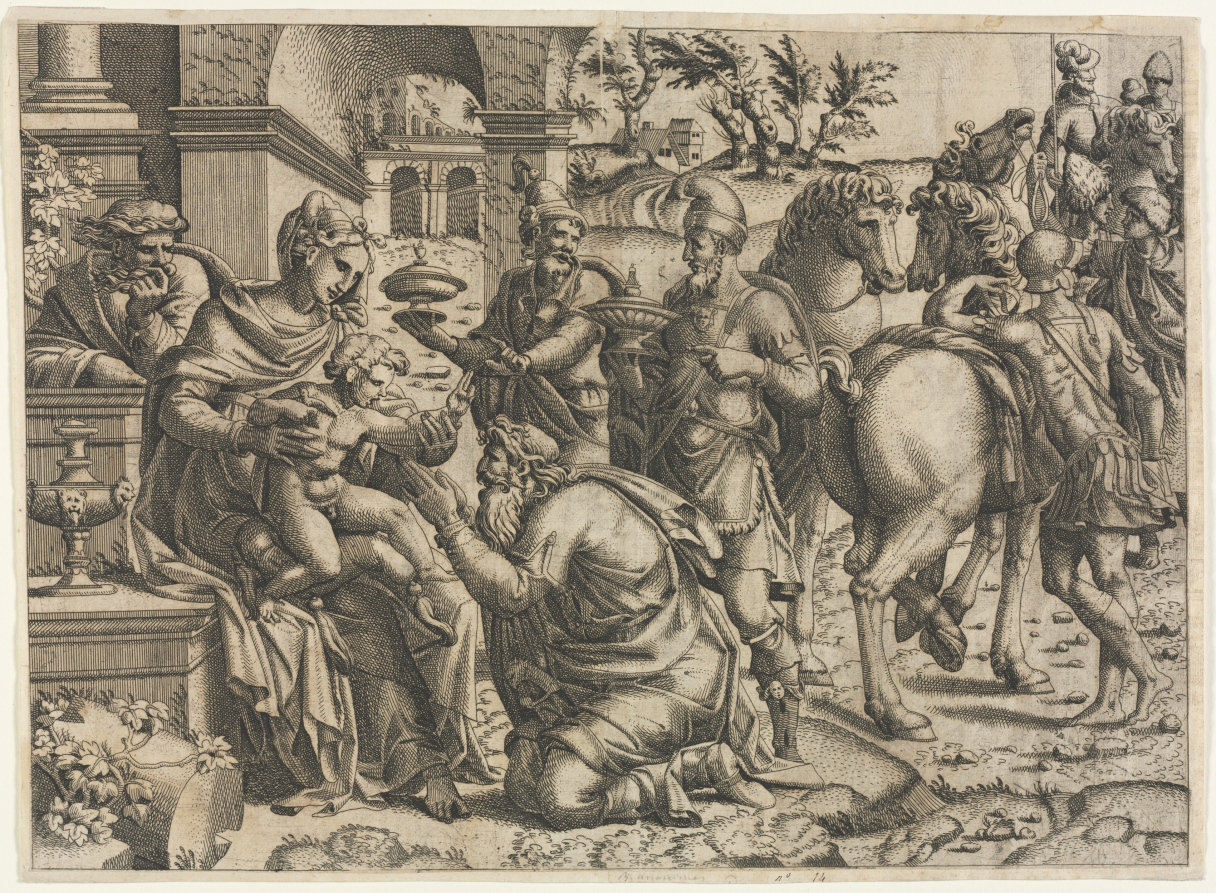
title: The Adoration of the Magi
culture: France, 16th century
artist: Jean Mignon (French, active c. 1535–55)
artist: after Luca Penni (Italian, 1500/04–1557)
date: c. 1545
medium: etching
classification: Print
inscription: SECONDARY SUPPORT, lower center, in graphite: [illegible] ; lower center, in pen and brown ink: n° 14 ; VERSO, lower right, in graphite: L'adoration des Majes / page 381 ; lower right, in graphite: B. 14 présume [illegible word] du Jo Migon / D'aprés Luc Penni / ([Plus?] bella)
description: Printmaking at Fontainebleau flourished briefly during the 1540s and seems to have stopped altogether by 1547. Jean Mignon was one of the four major etchers whose works are most closely associated with the workshop there. Almost all of Mignon's prints reproduce drawings by Luca Penni (1500/4–1557), an Italian painter active at the chateau. The elegantly elongated figures reflect the influence of Italian Mannerists, especially Parmigianino.